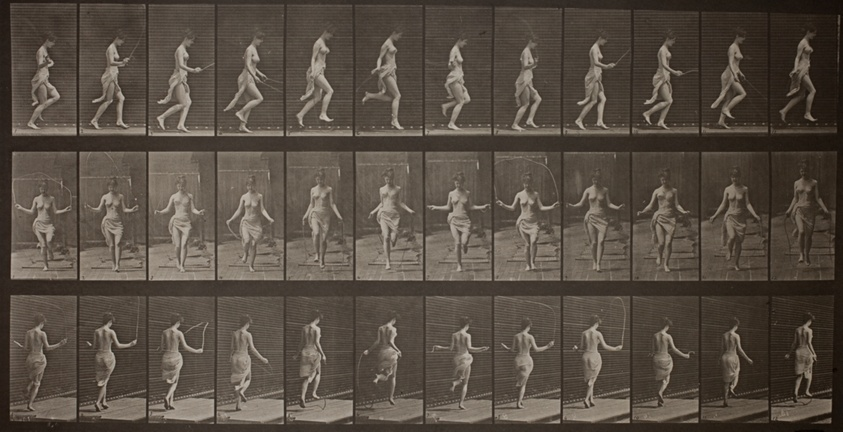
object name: Photograph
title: Animal Locomotion, Plate 174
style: 19th century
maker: Eadweard Muybridge (English, active United States, 1830–1904)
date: 1887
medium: Collotype, from "Animal Locomotion"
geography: England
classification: photograph; collotype; photography